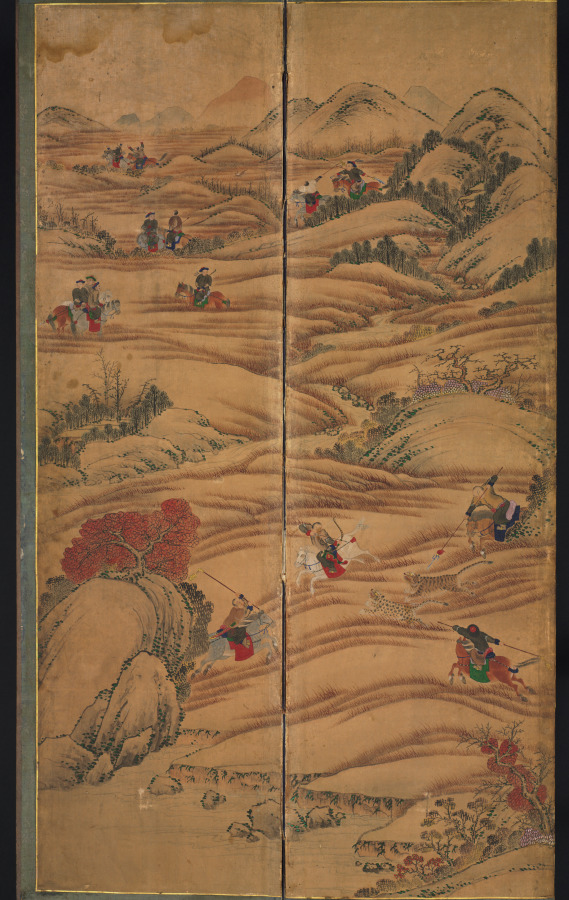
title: Hunting Scene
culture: Korea, Joseon dynasty (1392–1910)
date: 1800s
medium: eight-panel folding screen; ink and color on silk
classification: Painting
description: The theme of nomad warriors riding horses and hunting wild animals was first painted in the Qing imperial court in China in late 1600s. But it became favored by the Korean royal court and painted by the royal court painter in the late 1700s. The Joseon Korean ruling class members considered Qing nomad warriors to be "barbaric," yet highly admired their hunting and military skills. By the late 1800s, folding screens with the hunting scene were used largely for this dynamic and exotic feature.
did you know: The theme of nomad warriors hunting became highly appreciated in the Korean royal court of the 1700s for the king's particular interests in strengthening the royal army's military prowess.